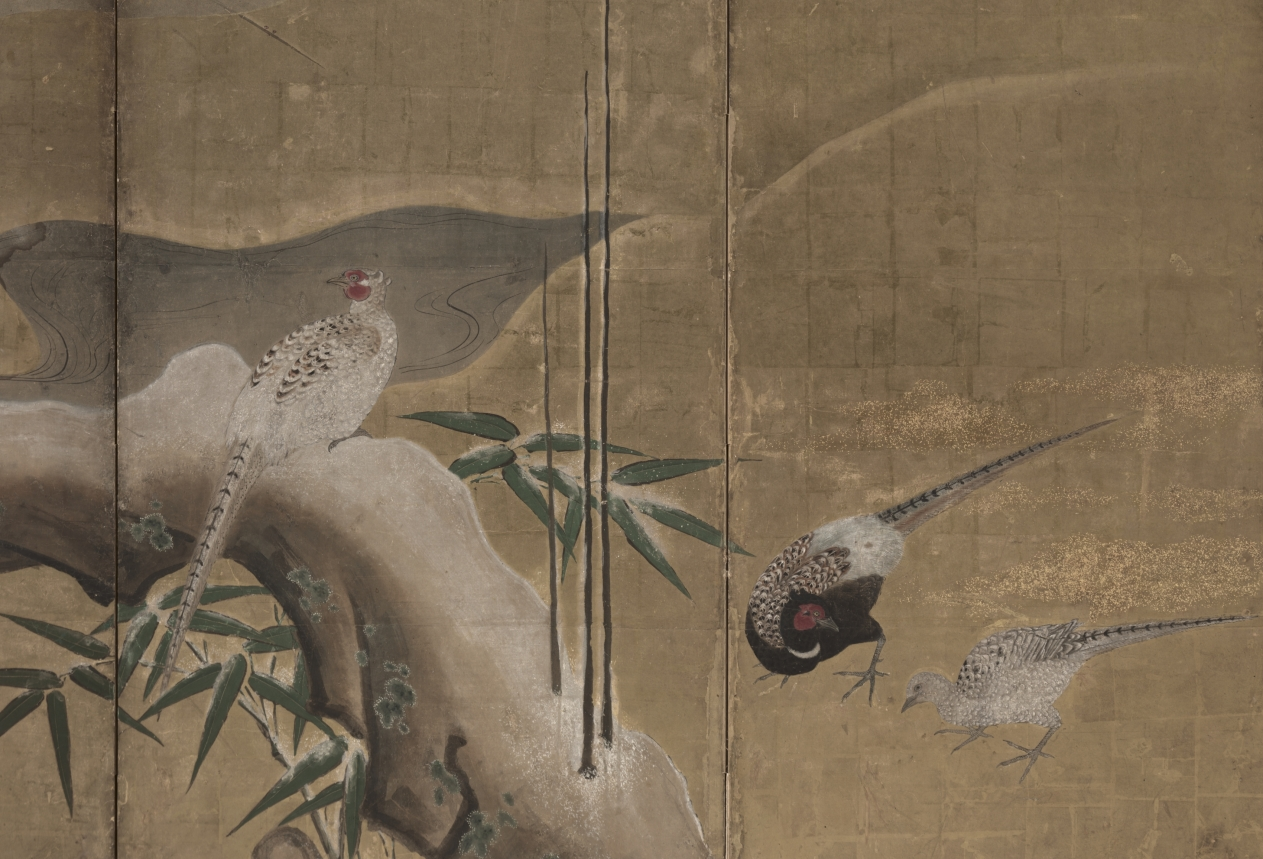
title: Winter Scene with Plum Trees and Pheasants (Birds Left)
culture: Japan, Edo period (1615–1868)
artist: Kano Naonobu (Japanese, 1607–1650)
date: early 1600s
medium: pair of six-fold screens, mineral pigments and gold leaf on paper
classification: Painting